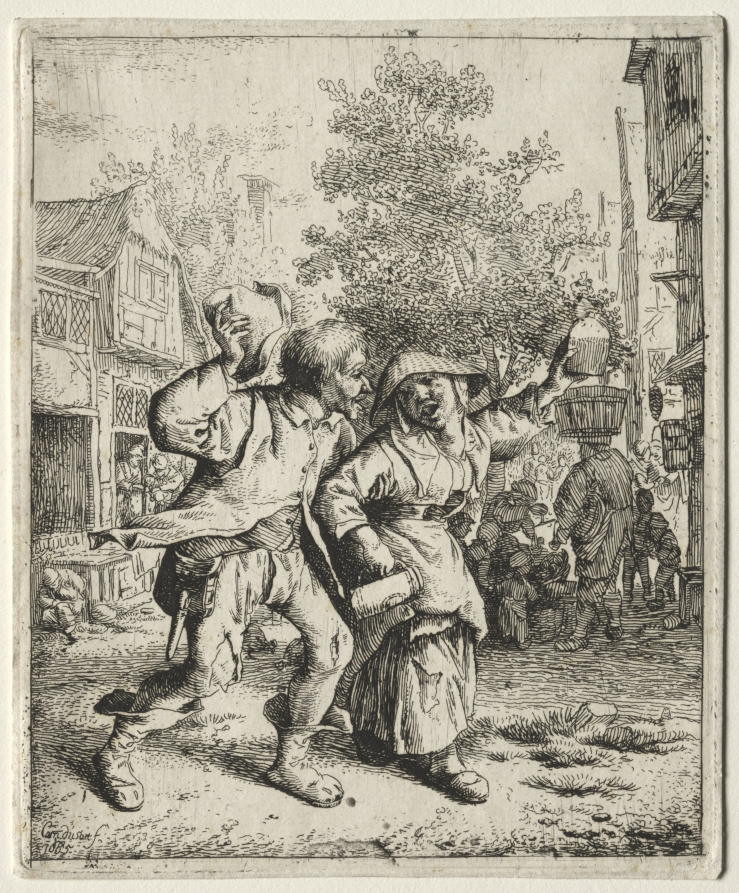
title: The Drunken Couple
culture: Netherlands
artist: Cornelis Dusart (Dutch, 1660–1704)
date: 1685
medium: etching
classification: Print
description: Images of intoxicated individuals were intended to be humorous, but they also had serious undertones. Moralizing texts and preachers described drinking as sinful, immoral, and a threat to social norms. Accordingly, a drunk woman, as seen here, compromised the well-being of the home, which was thought to have an impact on society as a whole.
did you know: Thatched roofs like the one depicted here were popular throughout Europe until the 1800s. Many of the thatched roofs in Europe today contain straw dating back to the 1600s.